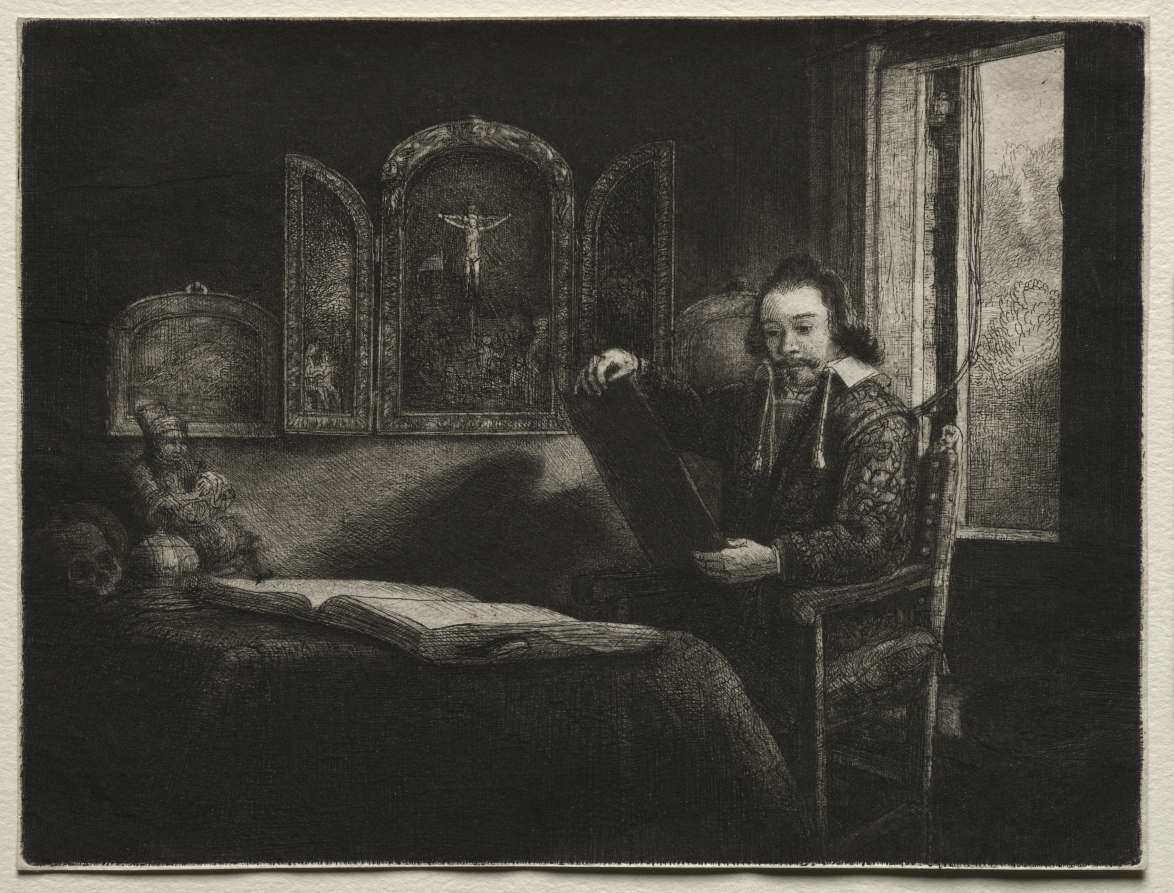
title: Abraham Francen, Apothecary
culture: Netherlands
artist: Rembrandt van Rijn (Dutch, 1606–1669)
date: c. 1657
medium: etching, drypoint, and engraving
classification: Print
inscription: VERSO, center left, in graphite: B. 273 / Bl. 176 ; center left, in graphite: 6th St. of 8. ; center left, in graphite: 7th state of 9. ; center, in graphite: 302X[circled and upside down] ; lower left, in graphite: a57722 ; across bottom third, in graphite: Su[illegible] passed quality. ; lower right, in graphite: FNX xv[underlined] ; lower left, in graphite: 7H x m ; lower right, in graphite: /97